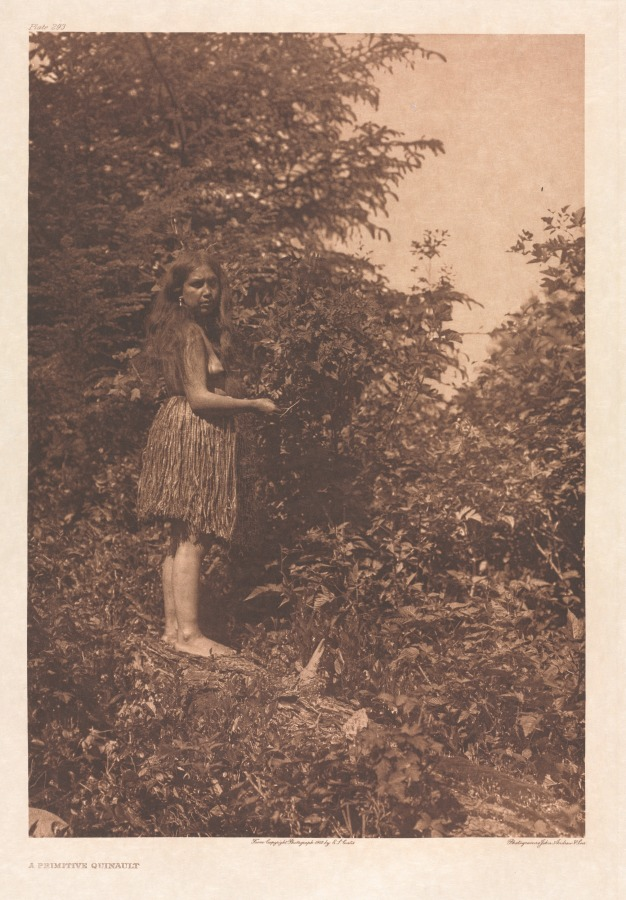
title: Portfolio IX, Plates 293- 328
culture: America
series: The North American Indian: being a series of volumes picturing and describing the Indians of the United States, The Dominion of Canada, and Alaska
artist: Edward S. Curtis (American, 1868–1952)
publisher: The University Press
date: 1898–1913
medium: photogravure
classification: Portfolio